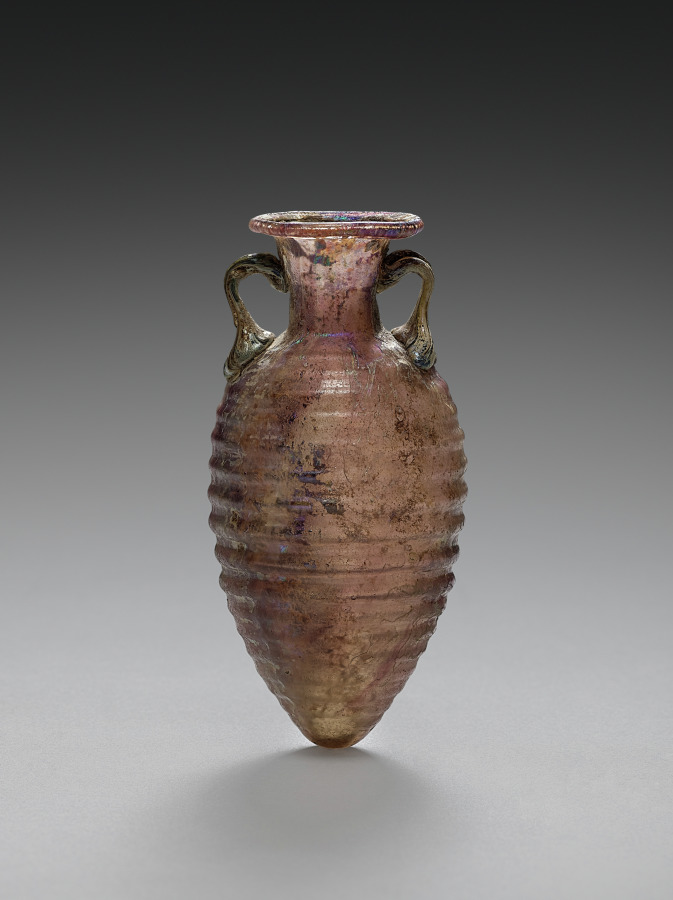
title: Amphoriskos (Small Amphora)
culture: Roman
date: 50–100 CE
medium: glass, mold-blown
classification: Glass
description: First blown in a mold, then supplied with separately made handles, this small vessel likely held perfumed oil, a valuable commodity. Originally violet in color, its surface is now partially marred by areas of buff and iridescent weathering. The finely ribbed body is quite elegant, however, and its extravagant modern box attests to its significant value for a modern owner (prior to 1919).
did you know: Although much smaller, glass amphoriskoi (“small amphorae”) are similar in form to ceramic transport amphorae.